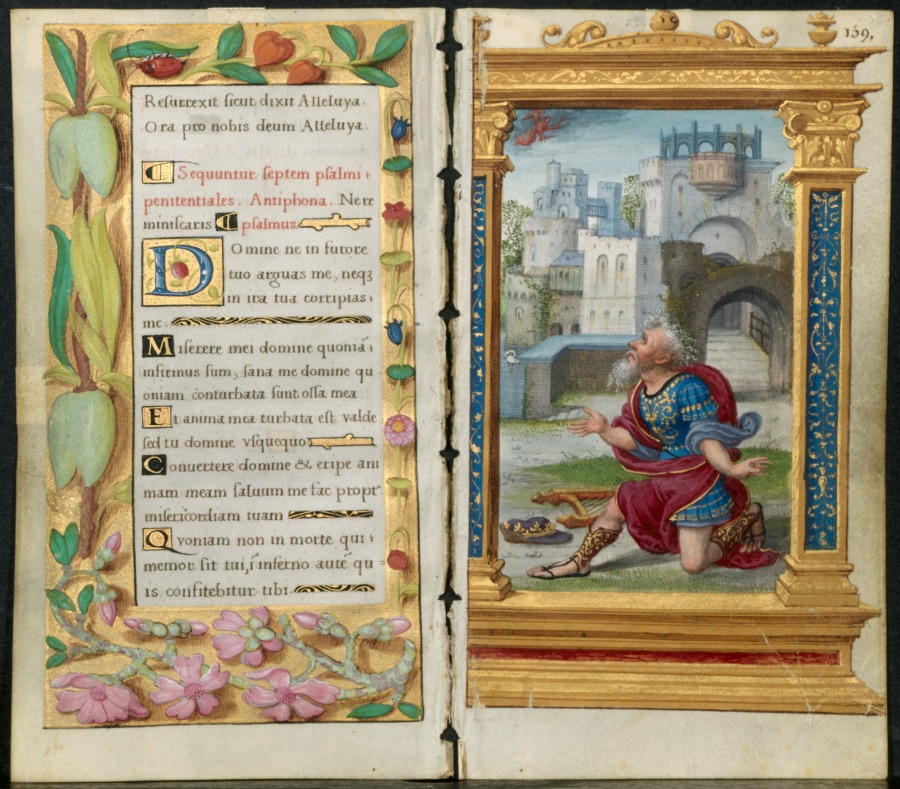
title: Adjoining Leaves from a Book of Hours: Penitential Psalms and King David in Prayer (2 of 3 Excised Leaves)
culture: France, 16th century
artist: Noël Bellemare (French, d. 1546)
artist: The 1520s Hours Workshop (French)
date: c. 1530–35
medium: ink, tempera, and liquid gold on vellum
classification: Manuscript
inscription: ...Resurrexit, sicut dixit, alleluia: Ora pro nobis Deum, alleluia. Sequuntur septem pfalmi penitentiales. Antiphona. Ne reminiscaris. psalmus: Domine , ne in durore tuo arguas me Miserere mei domine quoniam infirmus sum : sana me domine, quoniam conturbata sunt ossa mea Et anima mea turbata est valde : sed tu domine usquequo Convertere domine et eripe animam meam : salvum me fac propter misericordiam tuam. Quoniam non est in morte qui memor sit tui : in inferno autem quis confitebitur tibi.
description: These two adjoining leaves begin the penitential psalms, or holy poems recited to ask for forgiveness. An elderly King David is depicted kneeling in prayer after having committed great sins. He has cast his harp and hat to the ground as an expression of humility and looks up to the sky to ask forgiveness. The text of Psalm 6 begins with the large decorated initial D and reads, “Domine ne in furore tuo arguas me: neque in ira tua corripias me,” or “O Lord rebuke me not in thy indignation, nor chastise me in thy wrath.”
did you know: The seven penitential psalms were recited to ask for forgiveness; they coincide with the seven deadly sins.